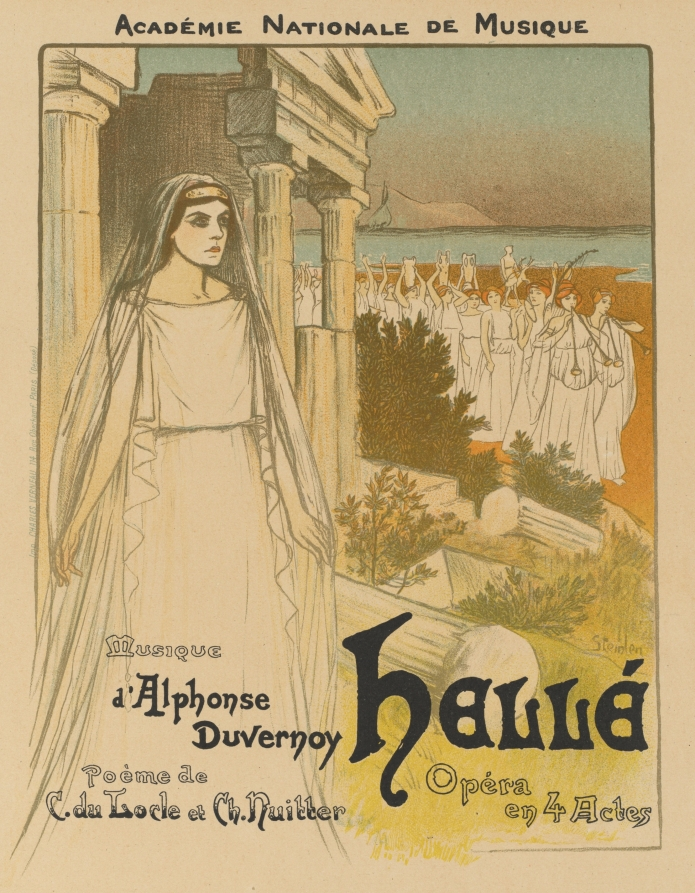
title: Hellé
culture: Switzerland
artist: Théophile Alexandre Steinlen (Swiss, 1859–1923)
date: 1896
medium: color lithograph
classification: Print